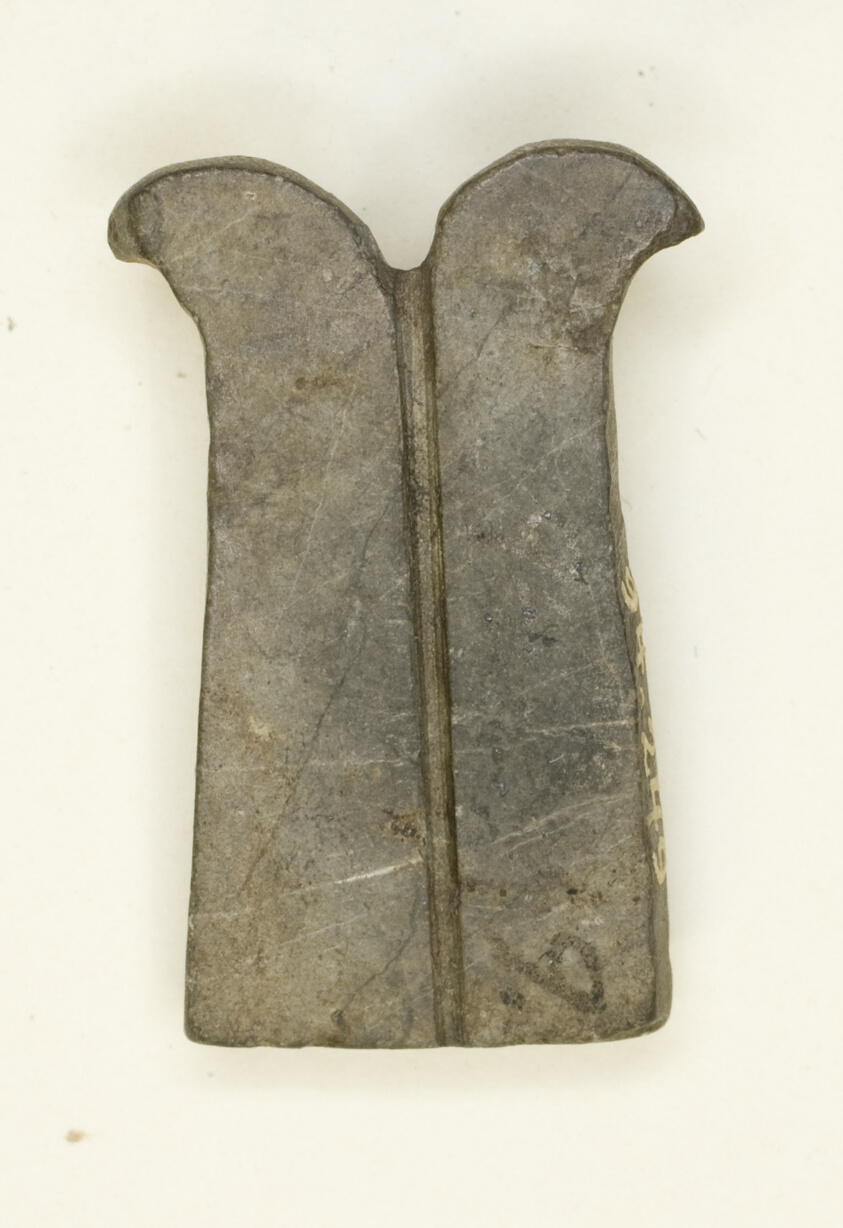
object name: Costume and Accessories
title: Amulet of a Forked Lance (Pesekh-kef)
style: egyptian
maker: Egyptian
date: Late Period, Dynasty 26–31 (664–332 BCE)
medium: Steatite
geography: Egypt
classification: amulet; jewelry; stone; ancient art; costume